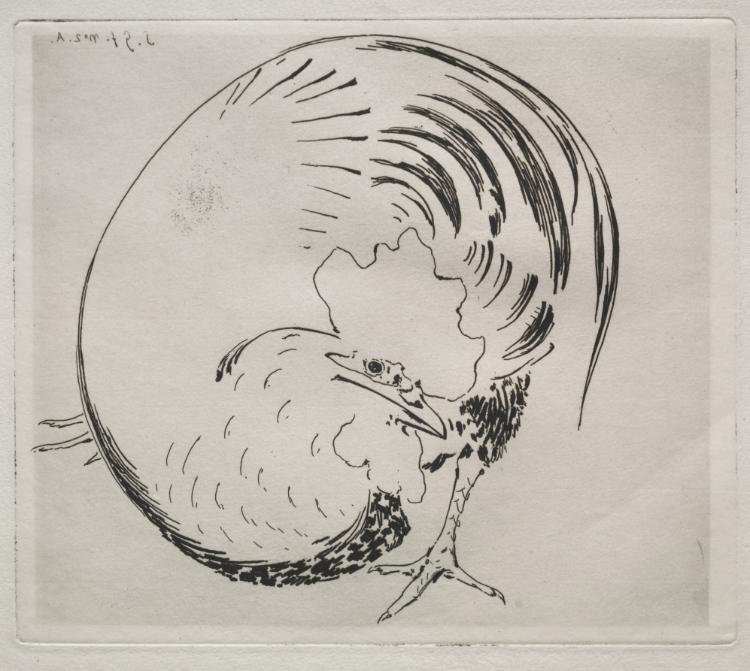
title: The High-Fired Service: Rooster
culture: France, 19th century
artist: Félix Bracquemond (French, 1833–1914)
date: c. 1860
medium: etching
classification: Print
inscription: upper left, in plate: S. G. F. No. 2. A. (in reverse)